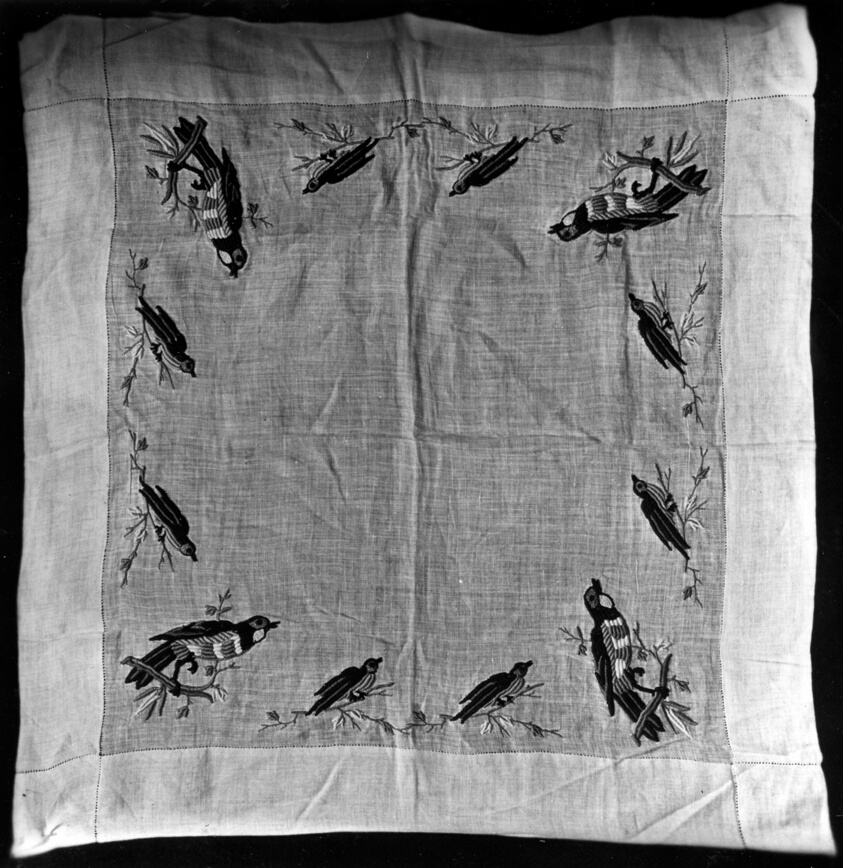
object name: Textile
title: Handkerchief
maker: France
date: c. 1880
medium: Linen, plain weave; embroidered with cotton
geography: France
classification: textile; accessories (object genre); weaving; needlework (visual works)